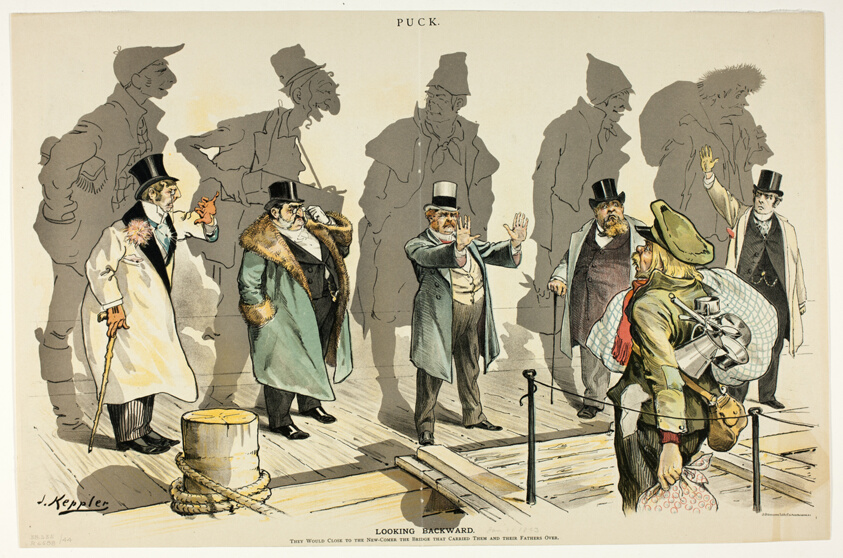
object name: Print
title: Looking Backward, from Puck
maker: Joseph Keppler (American, 1838-1894)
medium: Color lithograph on newsprint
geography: United States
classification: lithograph; print; prints and drawing